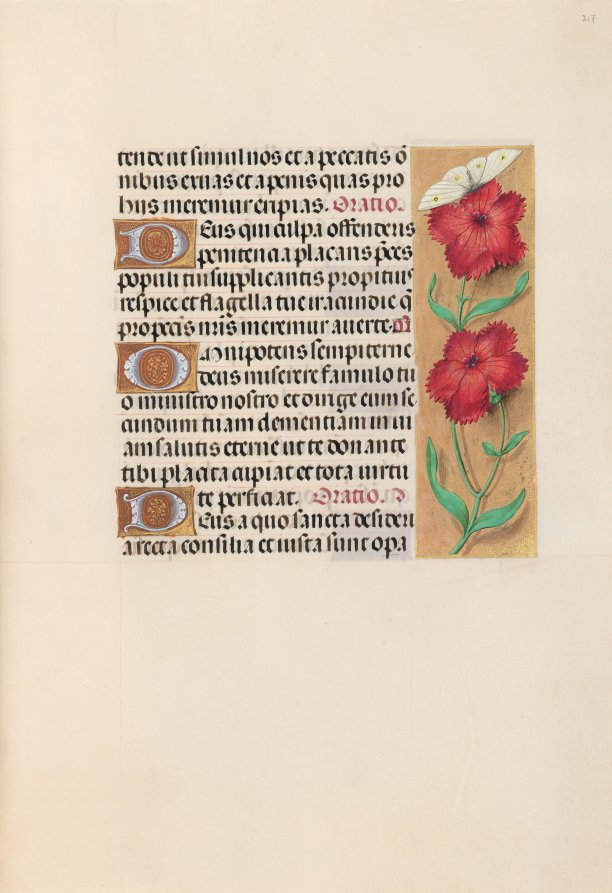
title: Hours of Queen Isabella the Catholic, Queen of Spain: Fol. 217r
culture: Flanders, Ghent and Bruges, late 15th century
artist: Master of the First Prayerbook of Maximillian (Flemish, c. 1444–1519)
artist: and Associates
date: c. 1500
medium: ink, tempera, and gold on vellum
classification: Bound Volume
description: This manuscript was illuminated by a circle of at least five highly organized manuscript painters active in the Flemish cities of Ghent and Bruges. The principal illuminator was Alexander Bening, who painted the majority of the book's miniatures. Manuscripts produced by this circle of artists are renowned for the decoration of their borders, which typically feature a rich variety of realistically-painted flowers, birds, and butterflies. This prayer book, called a book of hours, was intended not for a cleric, but for the private devotions of a lay person-in this case, Isabella the Catholic, Queen of Spain (1451-1504). Isabella's coat of arms embellishes the book's frontispiece. It is unlikely that the book was commissioned by the Queen herself; rather, she probably received it as a diplomatic gift from someone courting her patronage, perhaps Cardinal Francisco Jimenez de Cisneros. A Franciscan friar, Jimenez was dependent upon Isabella for his advancement, first to the post of Queen's confessor in 1492, and then to Archbishop of Toledo in 1495.